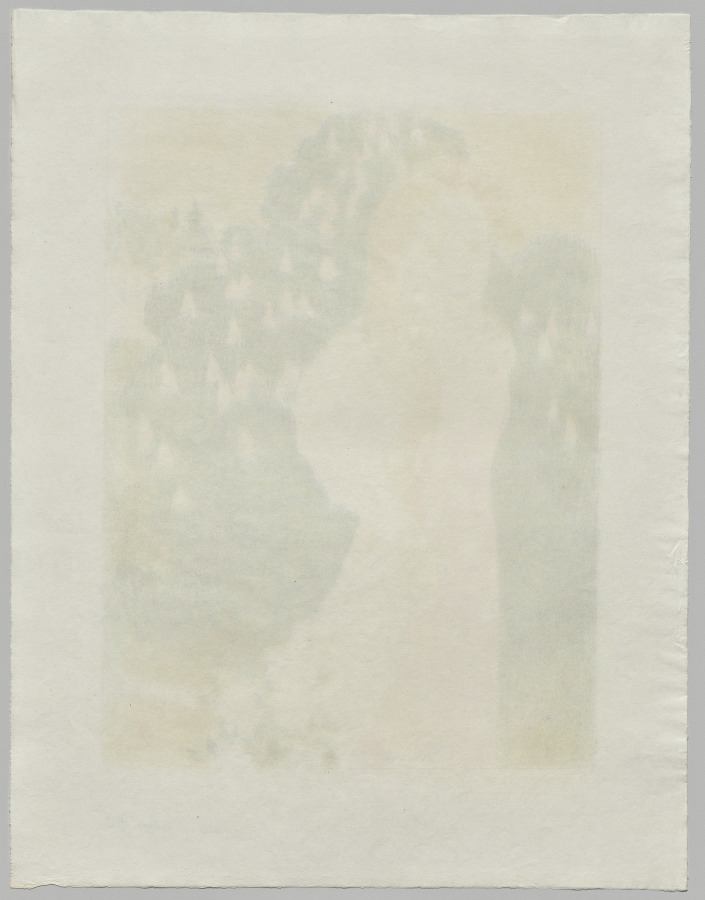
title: Twilights Have the Softness of Old Paintings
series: Love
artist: Maurice Denis (French, 1870–1943)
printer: August Clot (French, 1858–1936)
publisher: Ambroise Vollard (French, 1867–1939)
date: 1899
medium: color lithograph on wove paper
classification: Print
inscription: Recto, lower left: “les Crépuscules on tune douceur/d’ancienne Peinture”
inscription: In graphite, recto, lower right: “Maurice Denis 92 (?) (signed)”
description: Maurice Denis belonged to the Nabis, a group of artists who came together in 1889 to pursue a radical new style informed by subjective experience and emotion. This print is from a series in which Denis explored his devotion to his wife, Marthe, by depicting her in a variety of settings alongside titles drawn from his own journal. The vague but evocative images were meant to encourage the viewer to draw connections to the theme and meditate on its meaning.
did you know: Maurice Denis was a devout Catholic and often drew visual connections between his wife, Marthe, the subject of this print series, and the Virgin Mary.